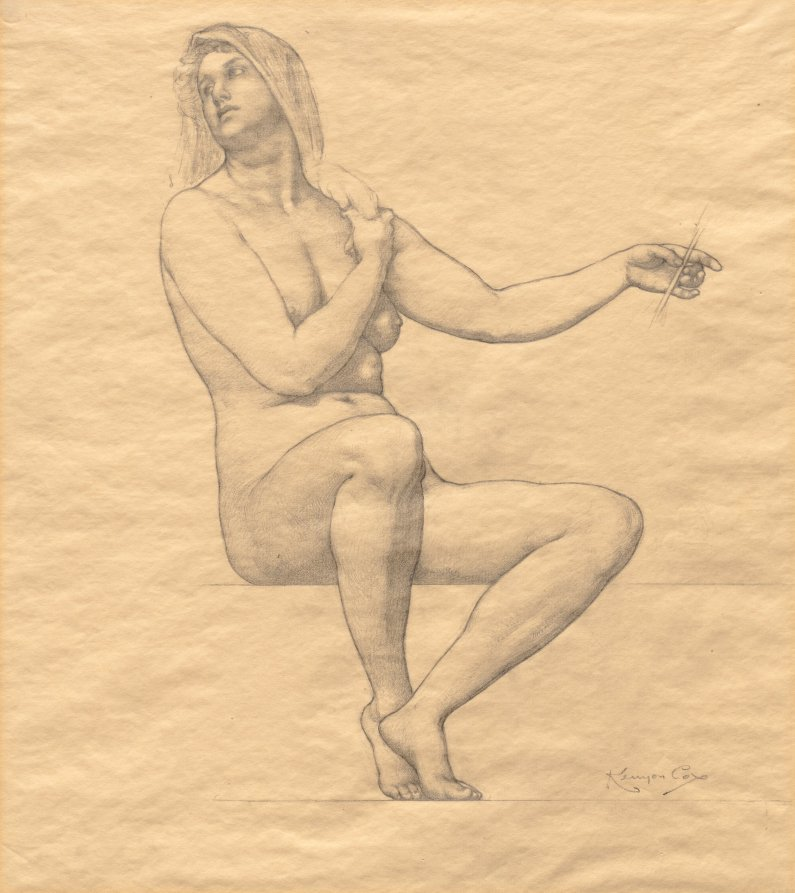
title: Sketch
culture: America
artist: Kenyon Cox (American, 1856–1919)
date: 1912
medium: graphite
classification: Drawing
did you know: This drawing is a preparatory sketch for United States currency, proposed during President Taft's administration.